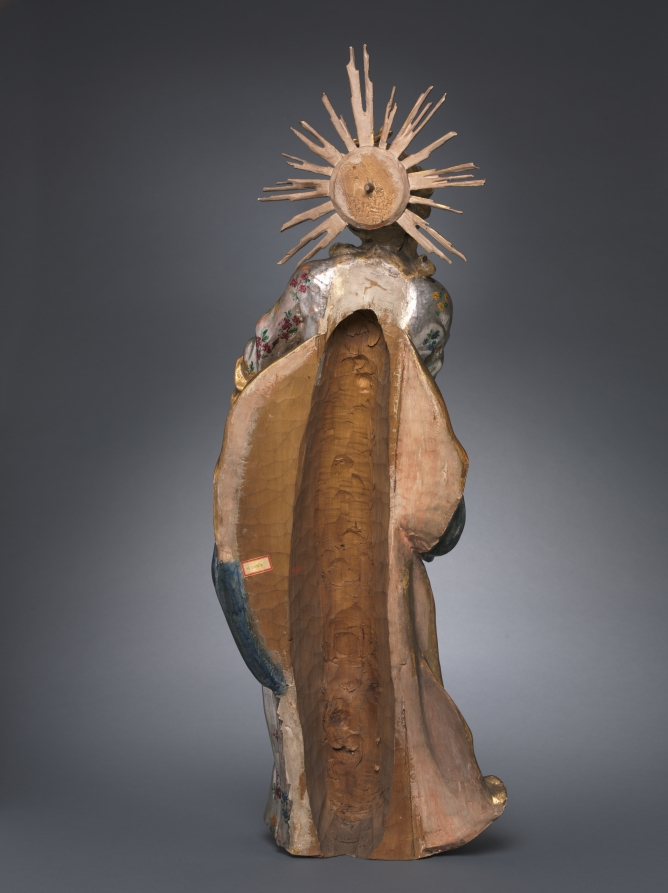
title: Virgin Mary as a Child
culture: Austria, Vienna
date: 1750–75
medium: painted and gilded wood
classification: Sculpture